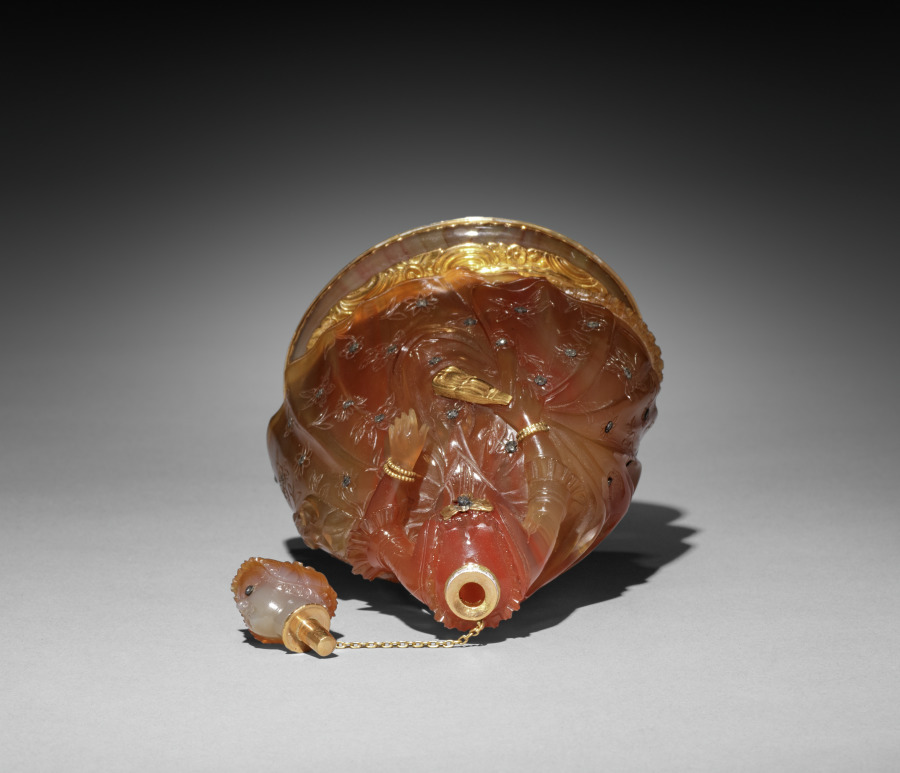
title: Scent Bottle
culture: England, 18th century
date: c. 1770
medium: chalcedony mounted in gold decorated with diamonds and enamel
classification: Miscellaneous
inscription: on neck collar: Gage d'amitie.